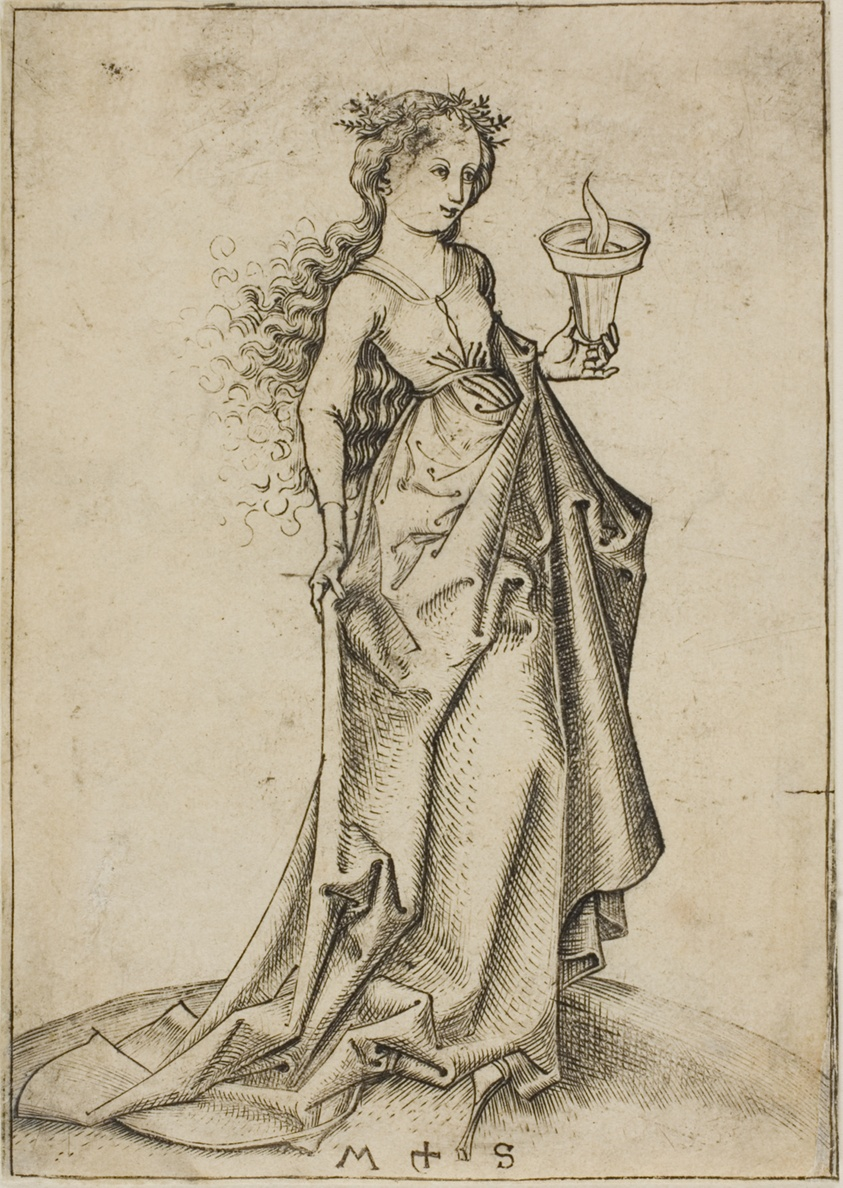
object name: Print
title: The Second Wise Virgin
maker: Martin Schongauer (German, c. 1430/50-1491)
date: 1480-1491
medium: Engraving on paper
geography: Germany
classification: engraving; print; prints and drawing